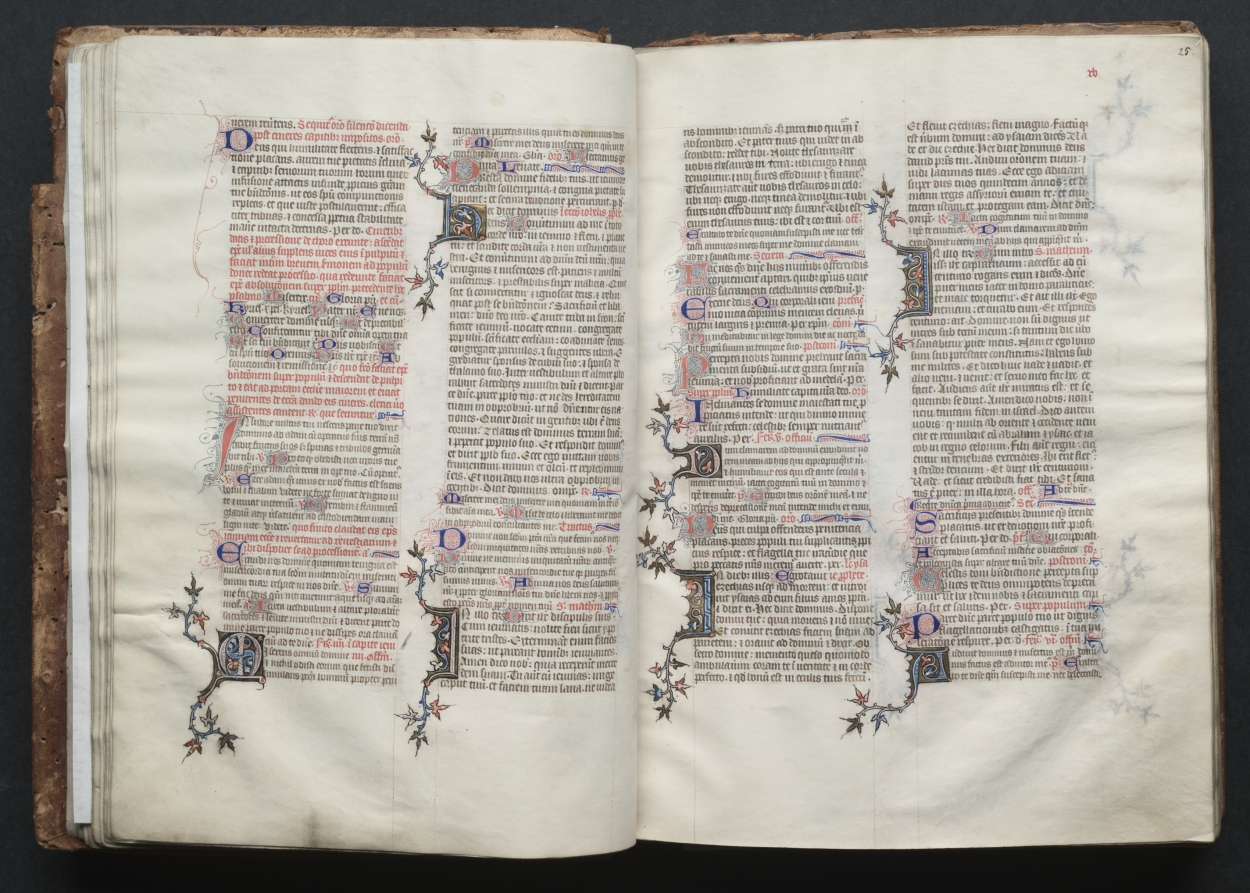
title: The Gotha Missal: Fol. 25r, Text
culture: France, Paris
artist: Master of the Boqueteaux (French)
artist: and Workshop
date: c. 1375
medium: ink, tempera, and gold on vellum; blind-tooled leather binding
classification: Bound Volume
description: The style and quality of this manuscript's decoration is typical of deluxe Parisian books made for aristocratic or royal patrons. Most of the book's decoration appears to be the work of the Master of the Boqueteaux, an artist active at the court of King Charles V (died 1380). His style was apparently shared by a number of book illuminators working in and around Paris. It is very possible that the Gotha Missal belonged to Charles V, but is not provable because the manuscript has no royal portraits and lacks a colophon. Given the book's magnificent decoration, however, it would seem that it was produced for a Valois prince, if not for the king himself. The manuscript receives its name from the German dukes of Gotha, its later owners.